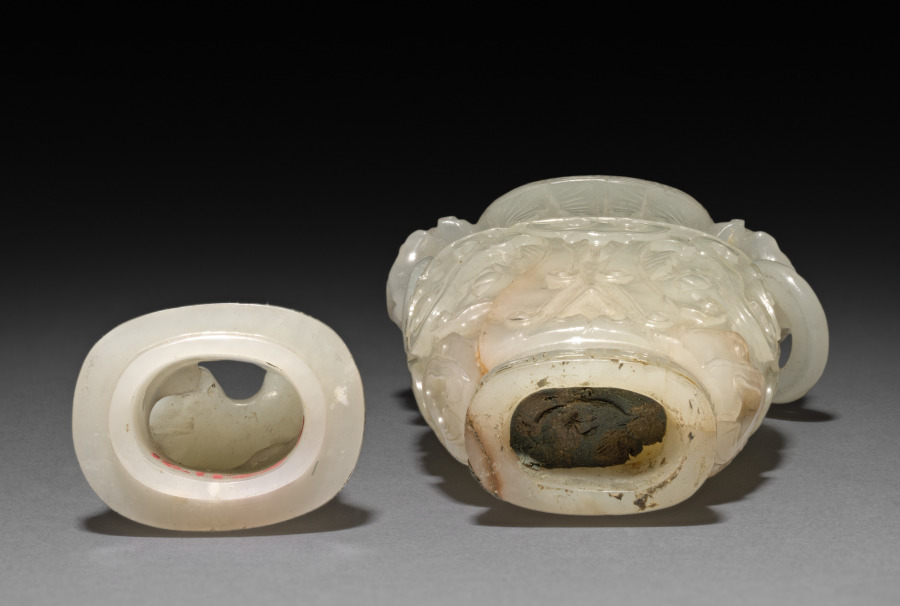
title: Jar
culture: China, Qing dynasty (1644-1911)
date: 1644–1911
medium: jade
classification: Jade